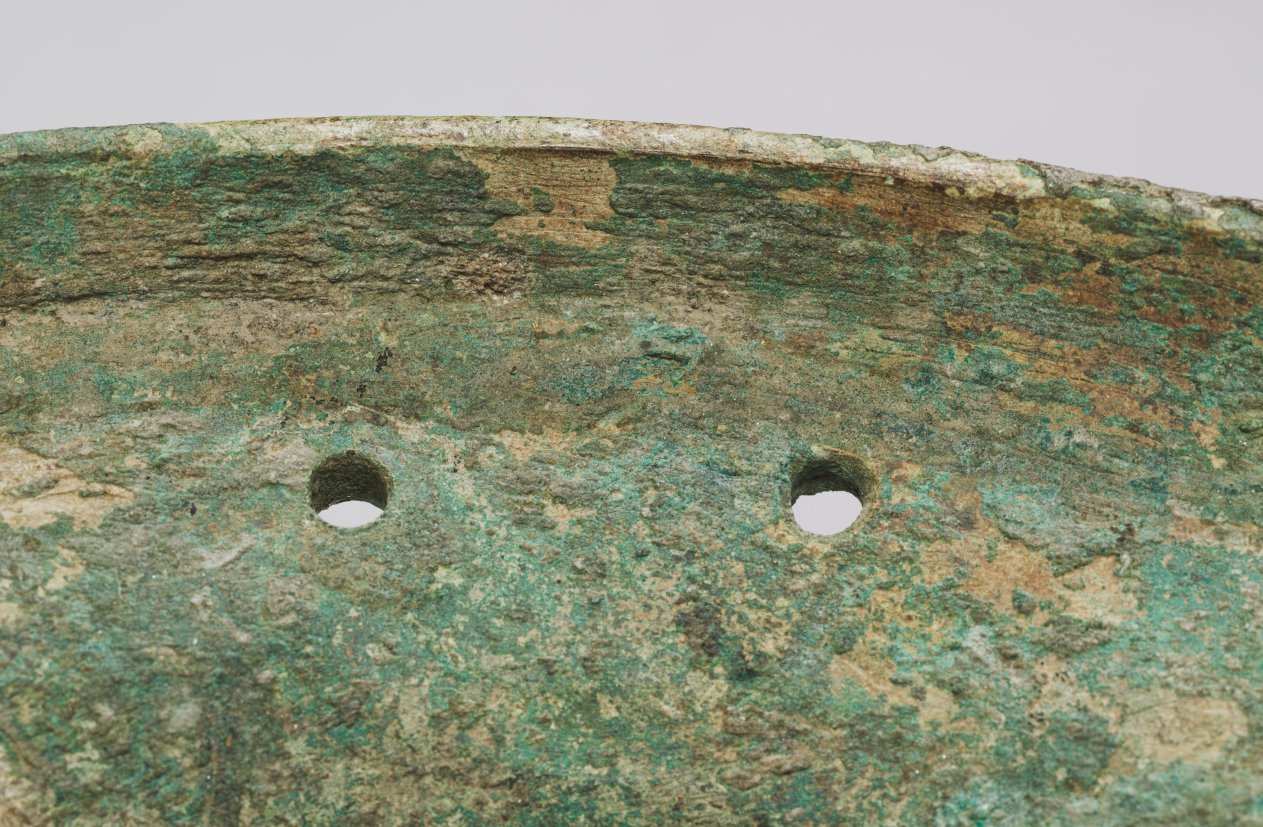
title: Bronze Volute Krater Base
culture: Greece, Laconia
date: late 600s BCE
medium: bronze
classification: Metalwork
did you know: This object supported a large vessel used for mixing wine with water called a krater.